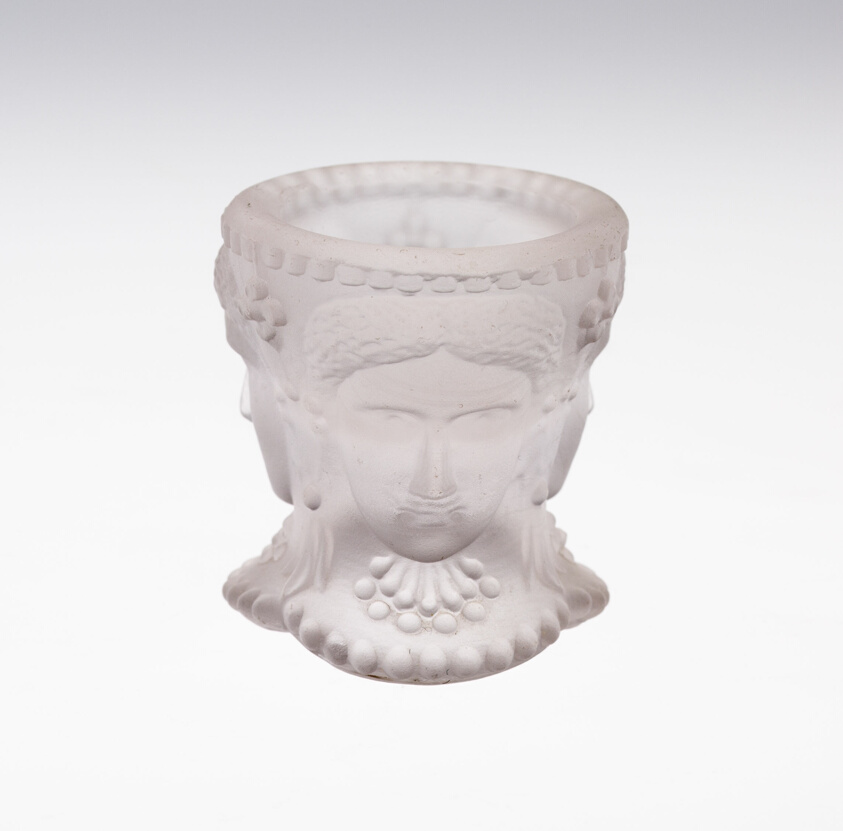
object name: Glass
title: Salt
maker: Possibly Europe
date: 19th century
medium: Glass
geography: Europe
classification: glass